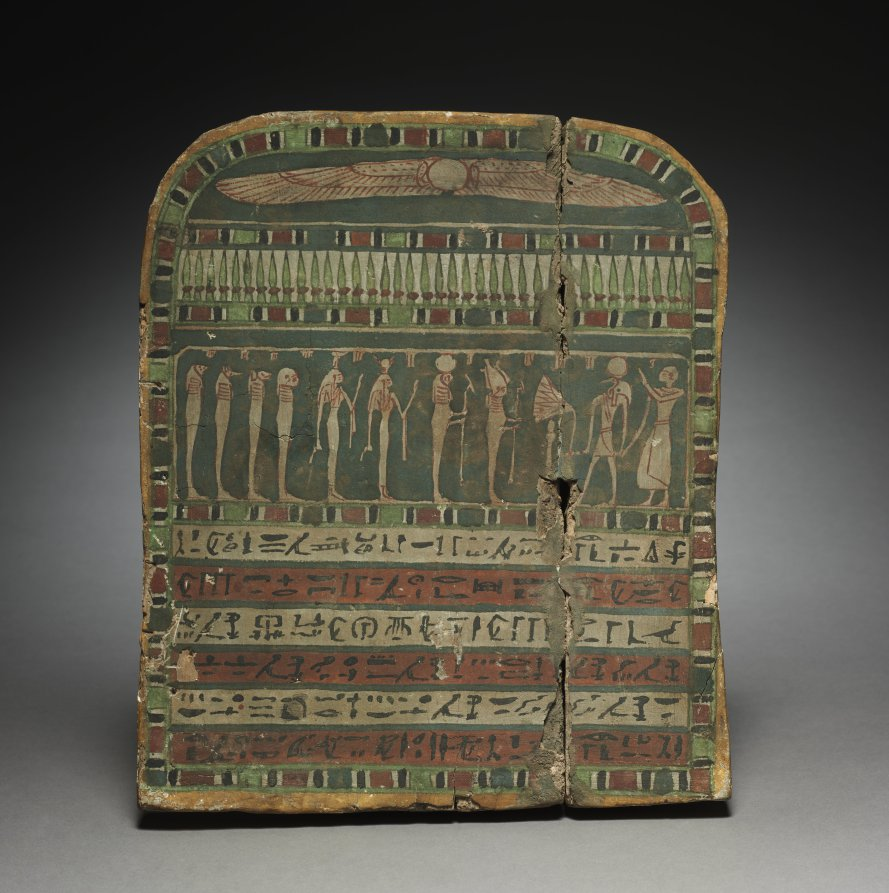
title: Tomb Stele of Nesptah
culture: Egypt, Late period (715–332 BCE), Dynasty 26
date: 664–525 BCE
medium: painted wood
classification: Funerary Equipment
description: A winged sun disk with pendant uraei (cobras) arches across the top of this funerary stele. The central scene depicts the deceased (at the right) being ushered by Thoth into the presence of the funerary gods. Led by Osiris and Ra-Horakhty, these gods are Isis, Nephthys, and the Four Sons of Horus. The tiny squares above them were intended for brief inscriptions naming each god, but the names were omitted, doubtless because of a lack of space.